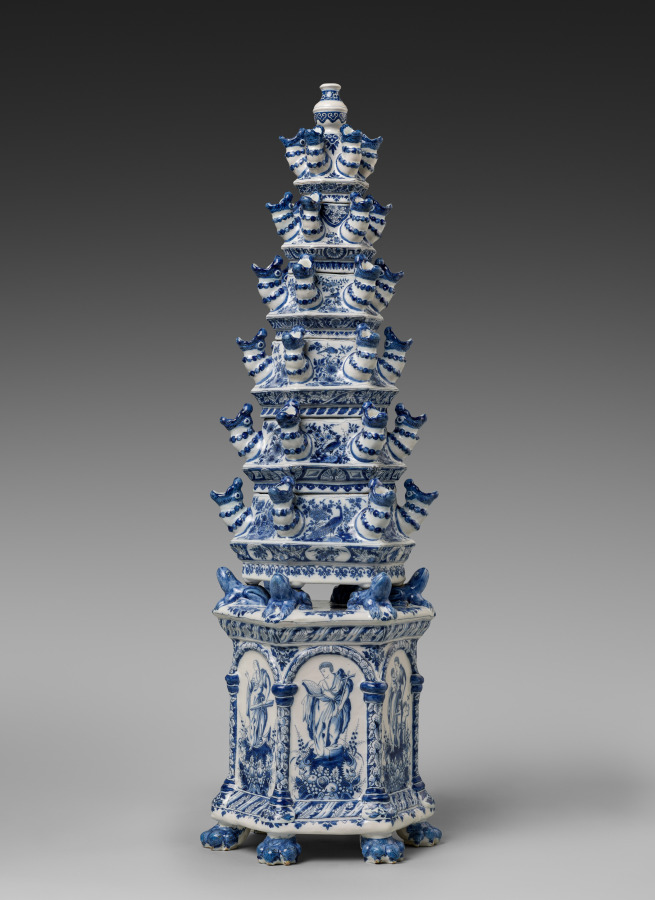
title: Flower Pyramid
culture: Netherlands, Holland, Delft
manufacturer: Adrianus Kocx (Dutch, active 1686–1701)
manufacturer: De Grieksche A (The Greek A) Factory (Netherlands, 1658–1811)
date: c. 1690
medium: Tin-glazed earthenware, painted in blue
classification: Ceramic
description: Allegorical figures representing Faith, Hope, and Love decorate the base of this pyramid, on which rest six tiers with spouts where flowers can be placed. Flower pyramids are among the most complex and luxurious types of ceramics produced in Delft in the late 1600s. This example was made in the Greek A Factory, owned by Adrianus Kocx. During his tenure, the factory became the most prestigious of Delft potteries and received commissions from Queen Mary II, who ruled over England, Scotland, and Ireland together with her husband, William III. She contributed to the international spread of the fashion for Delft ceramics.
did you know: The iconic blue-and-white ceramics from Delft originated as an attempt to copy Chinese porcelain.